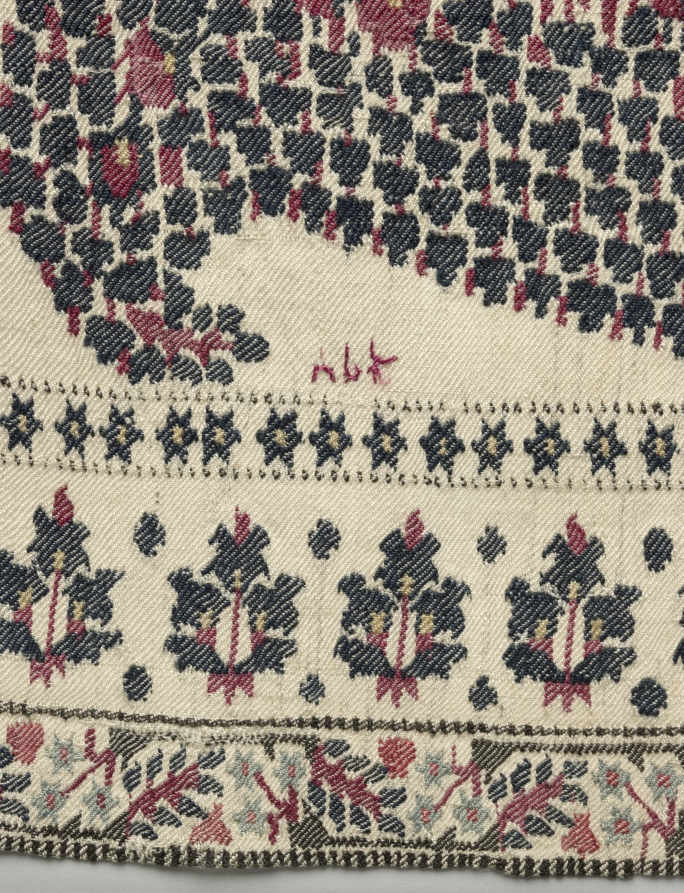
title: Long Shawl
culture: India, Kashmir, 19th century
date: c. 1812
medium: 2/2 twill tapestry weave, double interlocked; wool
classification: Textile